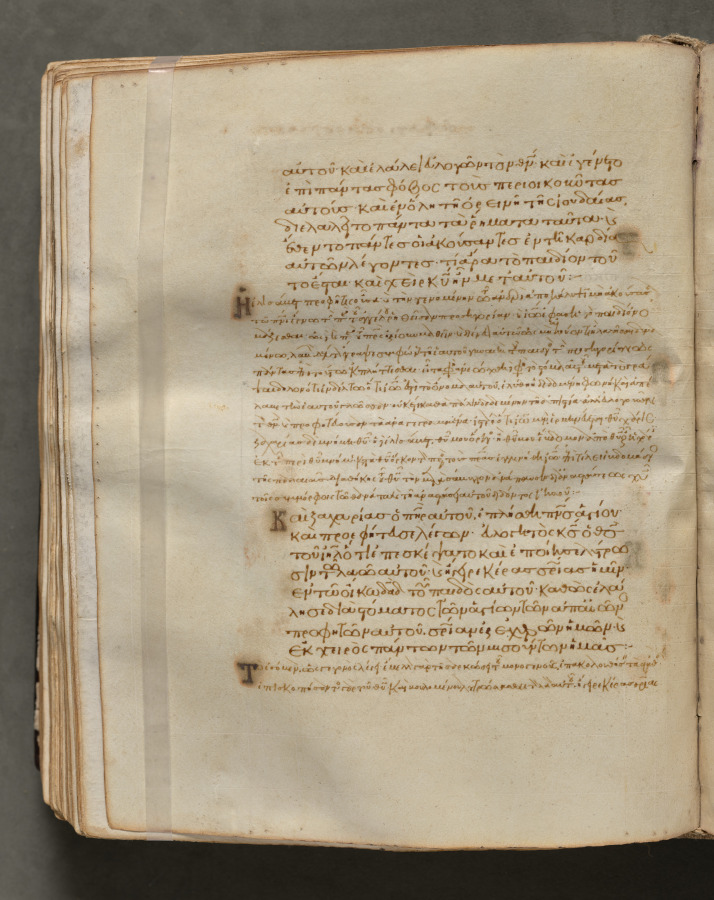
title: Text, folio 206 (verso), from a Gospel Book with Commentaries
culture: Byzantium, Constantinople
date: c. 1000–1100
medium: ink, tempera, and gold on vellum; leather binding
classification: Bound Volume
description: Each of the four gospels in this book opens on a page with brilliantly illuminated borders depicting the author of the text as well as birds-principally peacocks, symbols of the immortality of the soul-and fountains, representing the fountain of life and the salvation of the soul. This volume consists of 428 leaves with texts in Greek. Its level of sophistication suggests that it was probably written and decorated in a monastery in Constantinople.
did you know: Gospel Books were carried in procession through Byzantine churches.